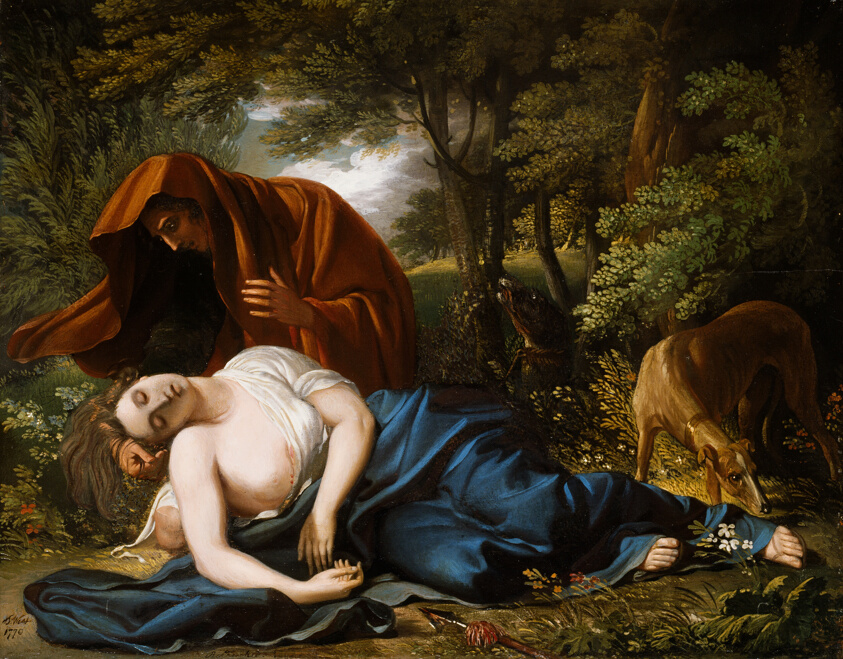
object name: Painting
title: The Death of Procris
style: 18th Century, nineteenth century, 19th century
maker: Benjamin West (British, born United States, 1738–1820)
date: 1770, retouched 1803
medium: Oil on panel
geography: England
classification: oil on panel; paint; oil paintings (visual works); british; painting; european painting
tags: Greek mythology, woman, weapons, trees, spears, nature, mythology, mythological figures, mythical, man, Greece, forests, flowers, dog, death, bushes, animals, Mourning, Century of Progress, world's fairs, Chicago World's Fairs